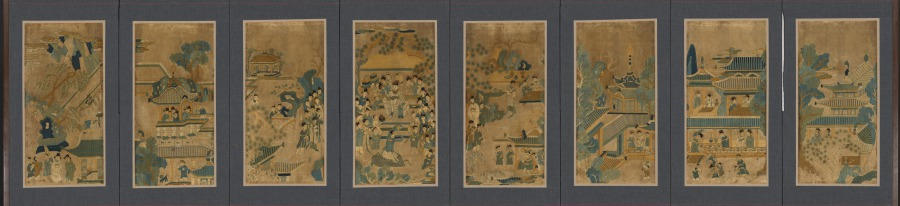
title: General Guo Ziyi’s Birthday Banquet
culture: Korea, Joseon dynasty (1392–1910)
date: early or mid-1800s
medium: Eight-panel folding screen, embroidery on silk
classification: Textile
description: The subject of this folding screen is a banquet in honor of Guo Ziyi (697–781), who is considered one of the greatest generals in Chinese history. He had a long and successful military career as well as a blissful family life. Thus, his image surrounded by his numerous family members symbolize the paragon of success and happiness. Using a wide spectrum of colorful silk threads, the artist colorfully depicts Guo enjoying his full-fledged retirement life.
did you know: This folding screen is highly likely to have been created by an amateur woman embroiderer.